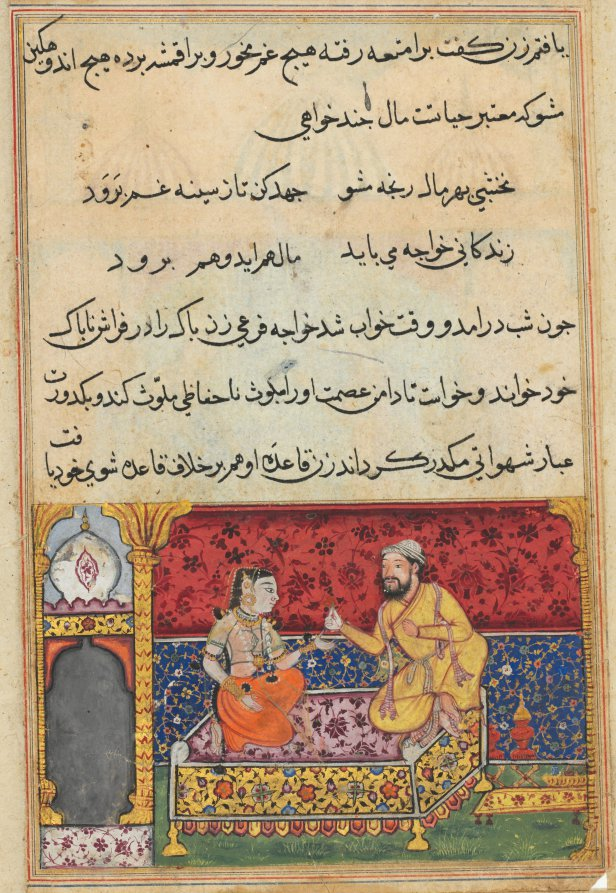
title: The young man changes himself to look like Mansur, and thus inveigles himself into the bed of Mansur’s wife, but is put off by her, from a Tuti-nama (Tales of a Parrot): Seventeenth Night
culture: Mughal India, court of Akbar (reigned 1556–1605)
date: c. 1560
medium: gum tempera, ink, and gold on paper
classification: Painting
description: The lascivious young man who magically transformed himself to have the appearance of Mansur the merchant kneels on an arabesque-patterned bed with Mansur’s wife. Although he looks like her husband, his actions and personality are different, so the woman suspects something is amiss and feigns illness to stall the imposter’s advances.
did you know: The imposter offers the woman a packet of paan to freshen her breath before love play.